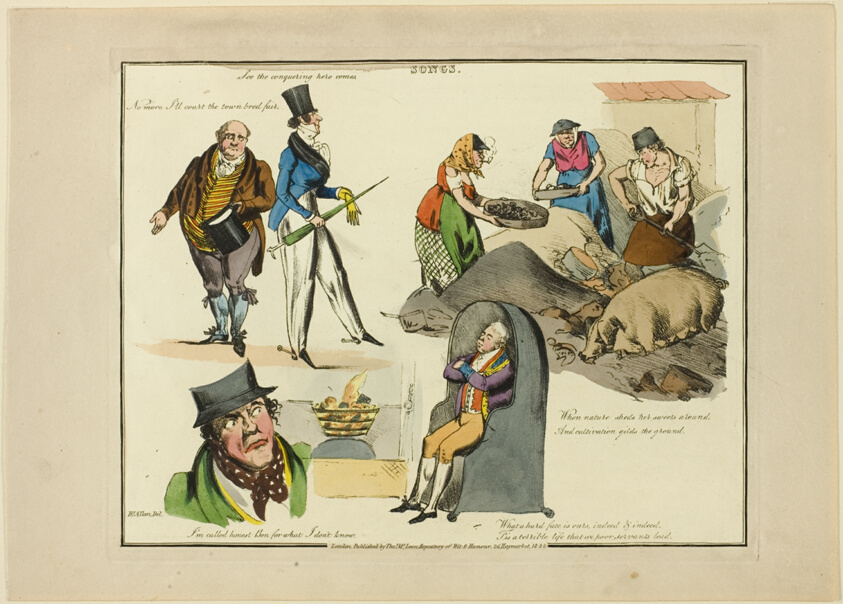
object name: Print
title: Plate from Illustrations to Popular Songs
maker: Henry Alken (English, 1785-1851); published by Thomas McLean (English, active 1790-1860)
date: 1822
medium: Soft ground etching with hand-coloring and aquatint on paper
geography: England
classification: etching; print; prints and drawing